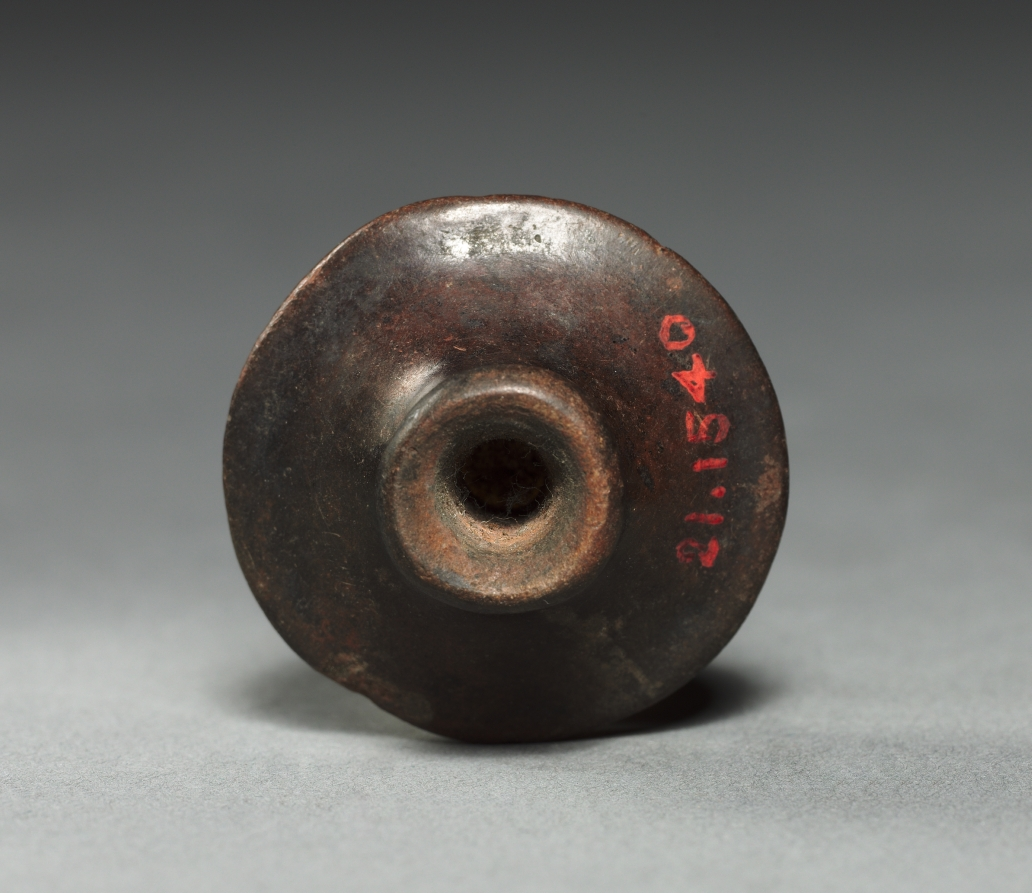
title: Button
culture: Colombia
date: before 1921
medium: black ware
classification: Ceramic